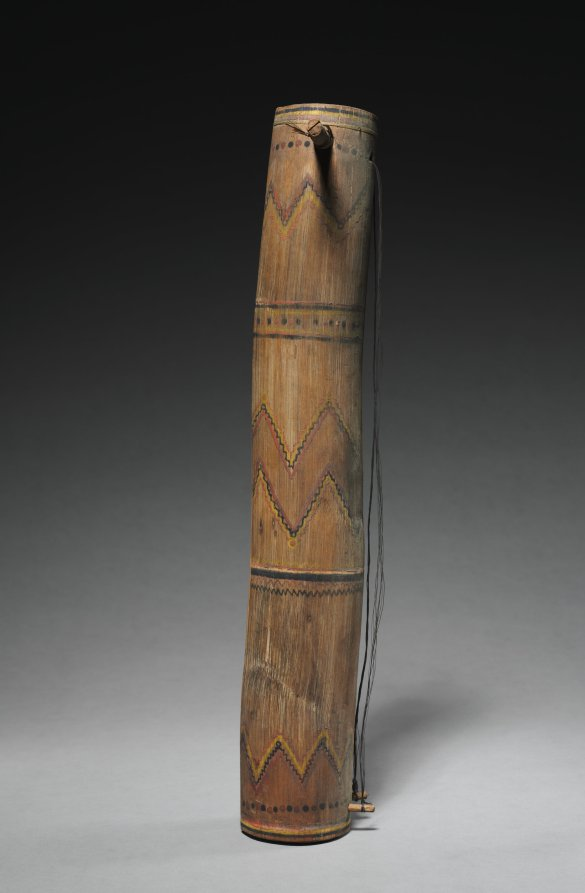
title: Fiddle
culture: America, North American Indian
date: 20th century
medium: wood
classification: Musical Instrument